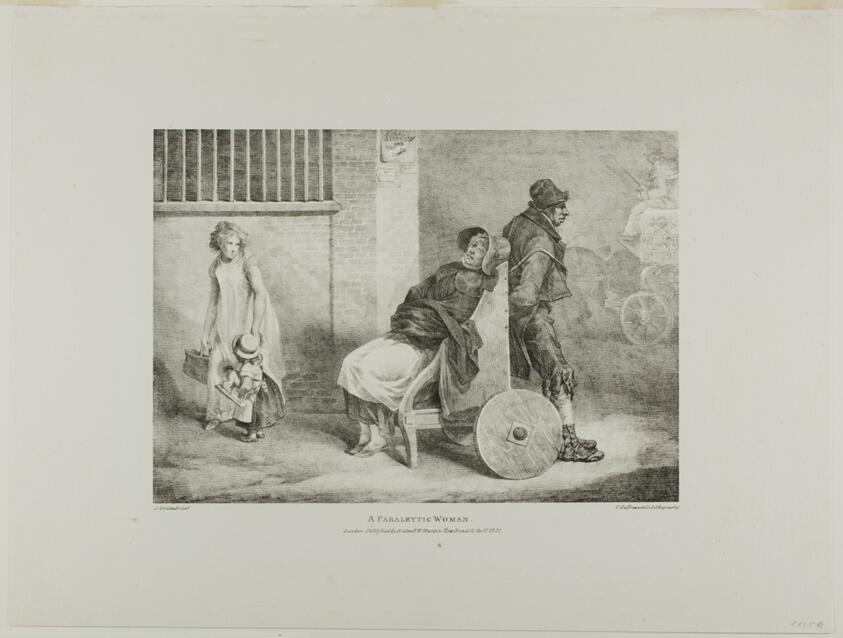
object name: Print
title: A Paraleytic Woman, plate 9 from Various Subjects Drawn from Life and on Stone (The English Suite)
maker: Jean Louis André Théodore Géricault (French, 1791-1824); printed by Charles Joseph Hullmandel (German and English, 1789-1850); published by Rodwell and Martin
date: April 1821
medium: Lithograph in black on ivory wove paper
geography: France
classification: lithograph; print; prints and drawing